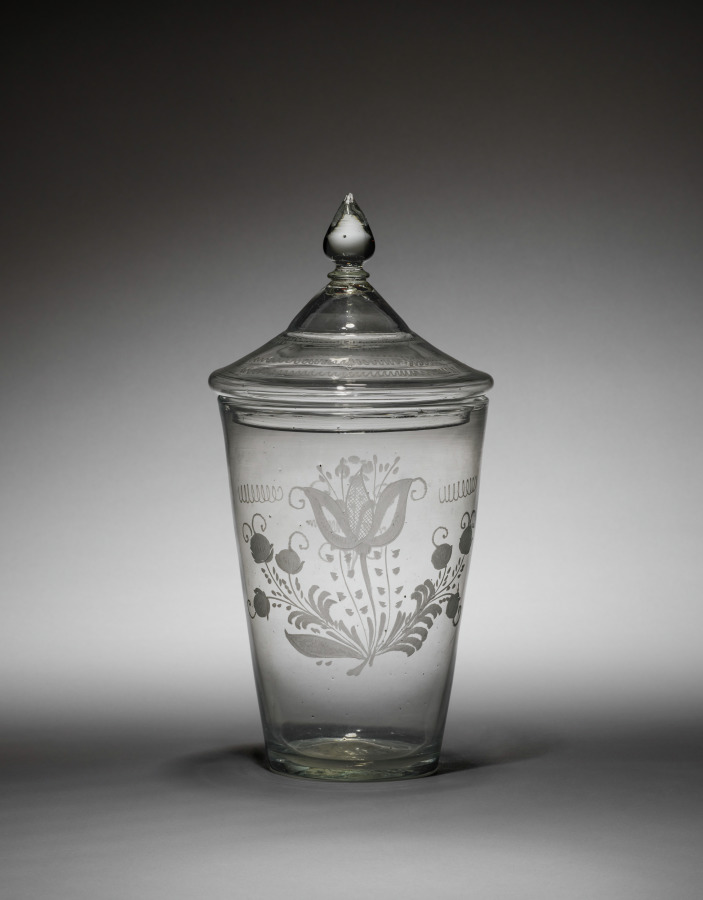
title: Flip Glass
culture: America, late 18th century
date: late 1700s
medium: glass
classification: Glass